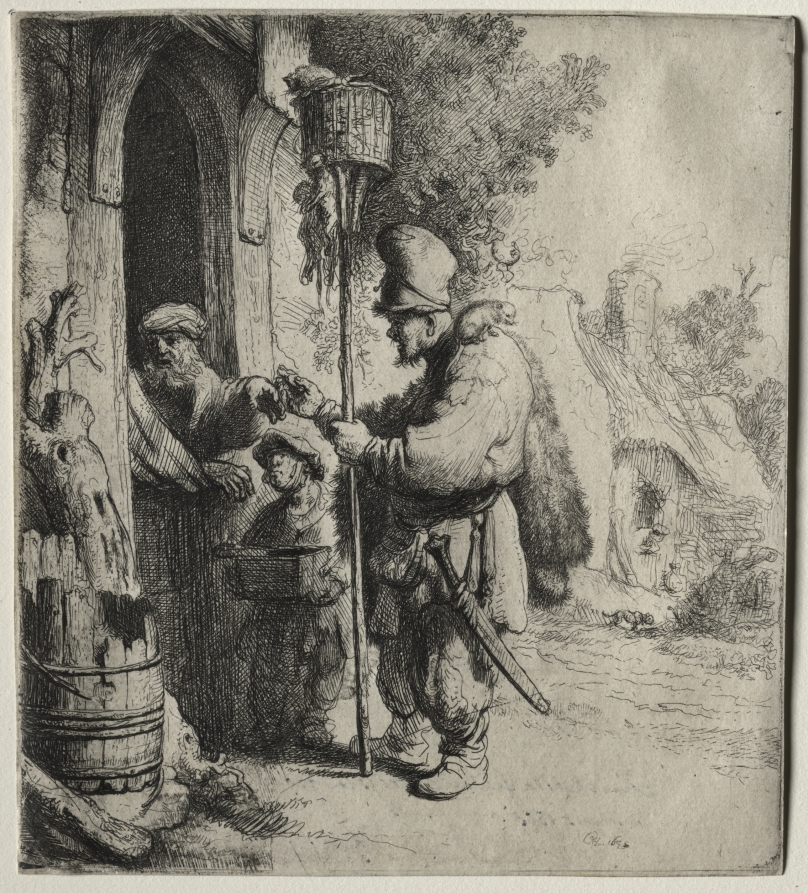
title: The Rat Catcher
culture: Netherlands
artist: Rembrandt van Rijn (Dutch, 1606–1669)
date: 1632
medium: etching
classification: Print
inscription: lower right, in plate: RHL[in monogram] 1632[last two numbers reversed] ; VERSO, upper right, in graphite (above collector's mark): 7903 ; lower center, in graphite: C. T. Wawra / Wien, Nov.-Dec. 1882. ; across bottom, in pen and black ink: Jean Martin frederik Geissler graveur on paysage / a Paris 1805 ; lower left, in graphite: E.[t?]/BH105. ; lower left, in graphite: B. 121 ; lower left, in graphite: A92585 ; lower center, in graphite: B. 121 ; lower right, in graphite: [illegible] ; lower right, in graphite: EHO ; lower right, in graphite: C L Blc. 95. II